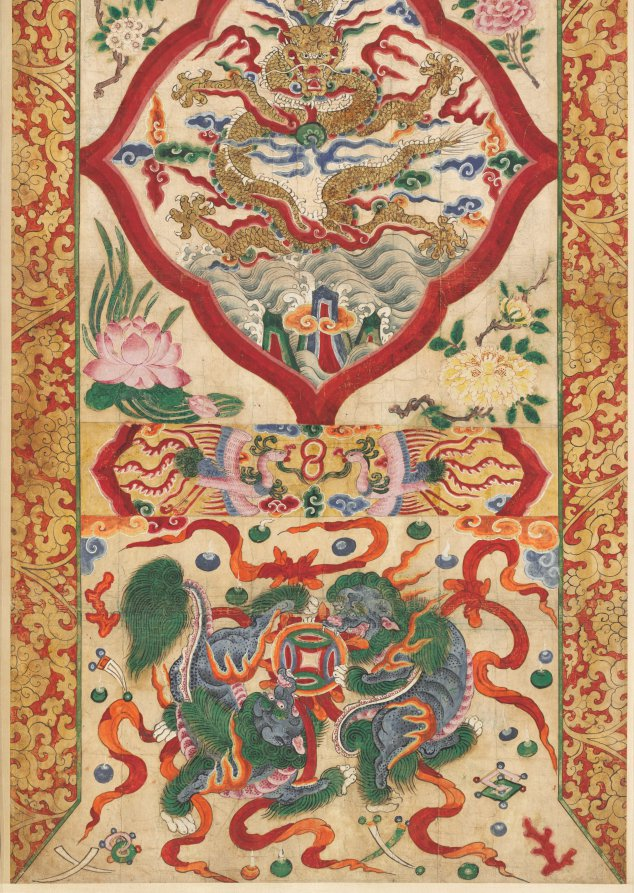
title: Painted Panel of Character "Recite"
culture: Korea, Joseon dynasty (1392–1910)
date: early 1900s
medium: hanging scroll, ink and color on paper; unmounted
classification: Painting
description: This set of four colorful hanging scrolls may have been used in an outdoor Buddhist ritual to evoke heavenly blessings. Each hanging scroll bears four different character; tiger, dragon, whistle, and recite. Traditionally, tiger and dragon belong to the four directional guards, respectively west and east.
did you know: This set of four colorful hanging scrolls may have been used in an outdoor Buddhist ritual to evoke heavenly blessings.